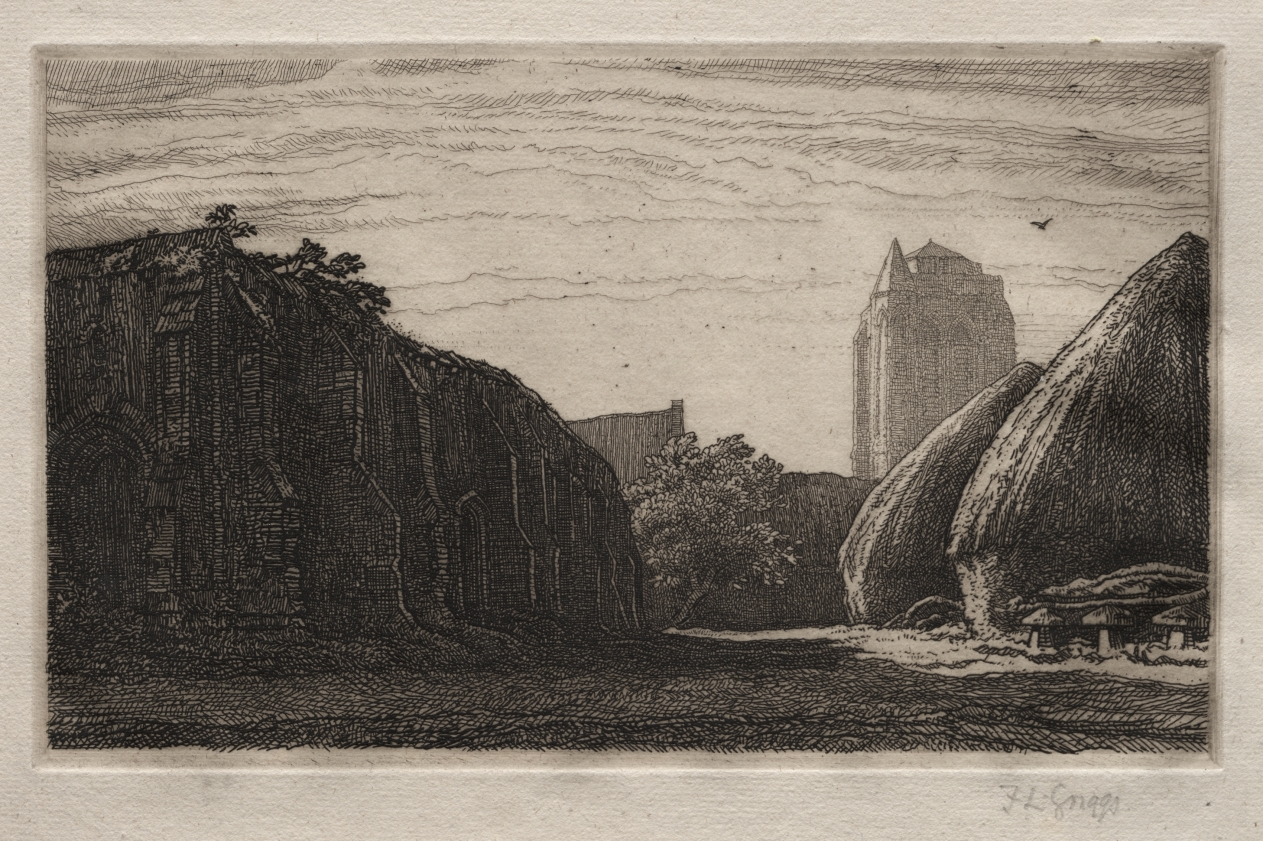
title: Maur's Farm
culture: England, 20th century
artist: Frederick Landseer Maur Griggs (British, 1876–1938)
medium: etching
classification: Print